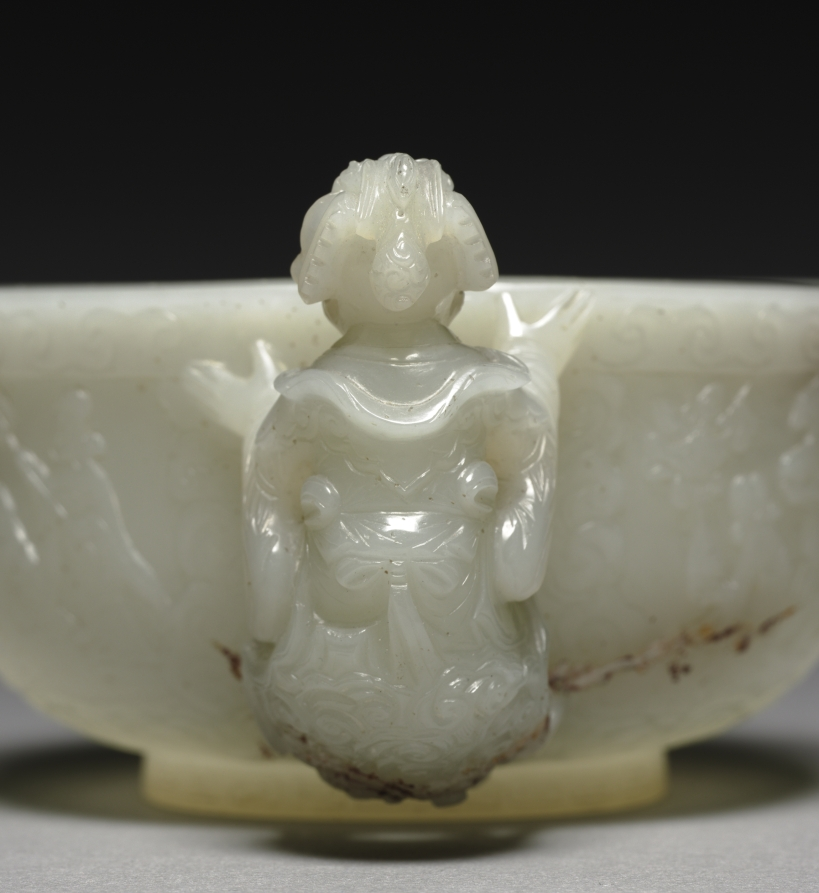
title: Cup with Daoist Figures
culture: China, Qing dynasty (1644–1911), Qianlong period (1736–95)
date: 1736–95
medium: Pale greenish-white jade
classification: Jade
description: During the Qing dynasty, Suzhou’s best products were sent north to the capital. Those that met imperial approval were sometimes graced with Qianlong’s mark, added by calligraphers and jade workers at court. The lack of a Qianlong mark on the Cleveland cup suggests that it might not have reached the court. Previously dated to the Yuan dynasty (1271–1368), new scholarship dates this cup to the Qing period.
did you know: Two female immortals serve as handles, while a Daoist procession with immortals, musicians, and attendants winds around the body of the cup.